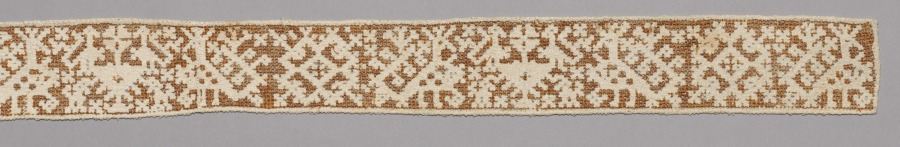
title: Lace Band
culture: Italy, Sicily, 1500s-1600s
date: 1500s-1600s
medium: Linen: needle lace (drawnwork)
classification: Lace